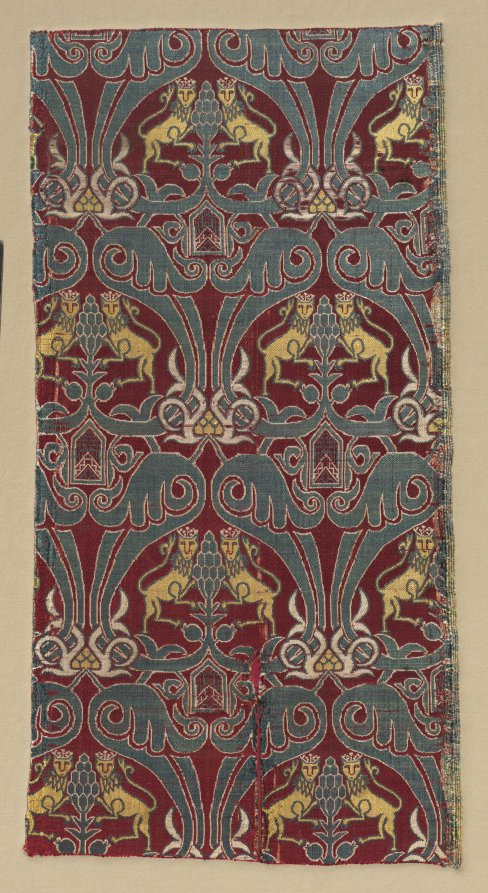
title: Fragment with crowned lions, palmettes, and escutcheons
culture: Spain, Granada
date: 1400s-1500s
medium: Silk: lampas weave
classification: Textile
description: Pairs of yellow lions are framed beneath arches formed by elaborate green leaves in a sumptuous repeated pattern. The city of Granada in southern Spain, where the Alhambra palace stood, continued to be a major center for silk production and commerce through the 1500s. Because the upside-down shields contain no Arabic inscriptions, it was probably made after the fall of the last Muslim sultan to the Christian King Ferdinand and Queen Isabella in 1492.